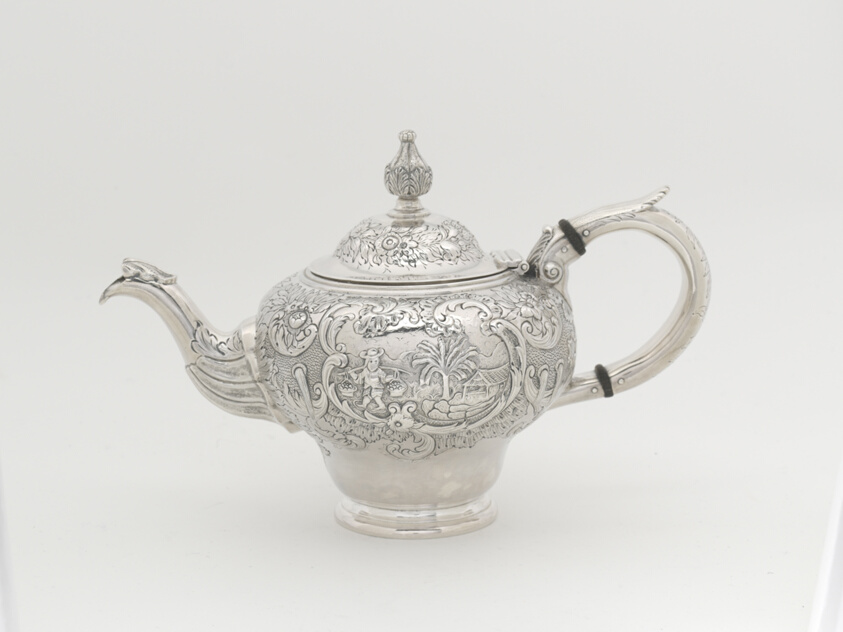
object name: Metalwork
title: Teapot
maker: Obadiah Rich; American, 1809–1888; Boston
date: 1848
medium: Silver and wood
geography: Boston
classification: teapot; silver; american decorative arts; american arts; decorative arts